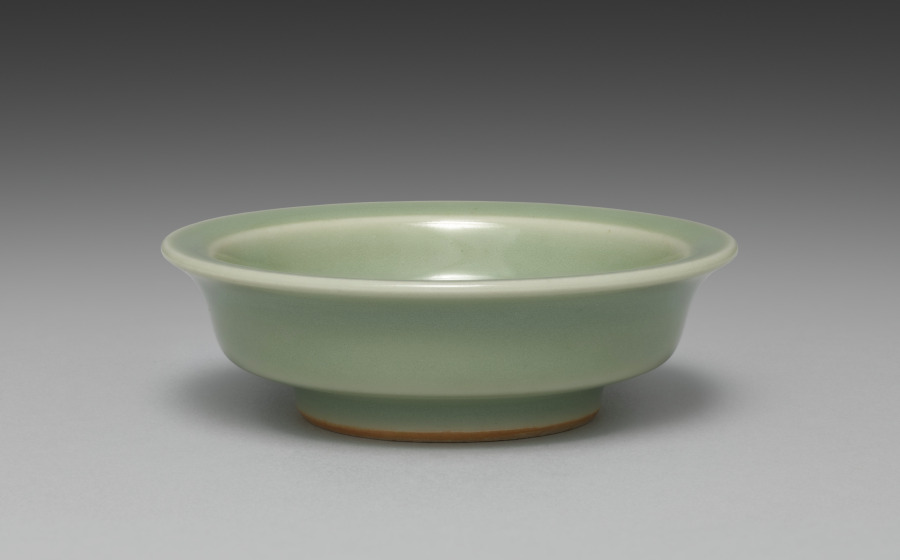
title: Saucer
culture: Japan, Meiji period (1868–1912)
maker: Seifū Yohei III (Japanese, 1851–1914)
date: 1893–1914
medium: One from a set of ten dishes; porcelain with green glaze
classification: Ceramic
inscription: 清風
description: Yohei III’s main output for his sophisticated clientele was in the form of tea sets and dining sets. He created a range of dishes in green glazes. He often produced in pairs, sets of five, or sets of ten. For this set of ten small dishes in a simple, round form that emphasizes the glaze above all, the box lid designates the piece as seiji, or green-glazed porcelain, using a general term for the extensive palette of green glazes often called celadon in English. The box lid further identifies the dishes themselves as tōchō, literally “bean-sized saucers,” a size that makes them suitable for dipping sauces.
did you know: The ten dishes in this set are stored in stacks of five in a two-compartment box.